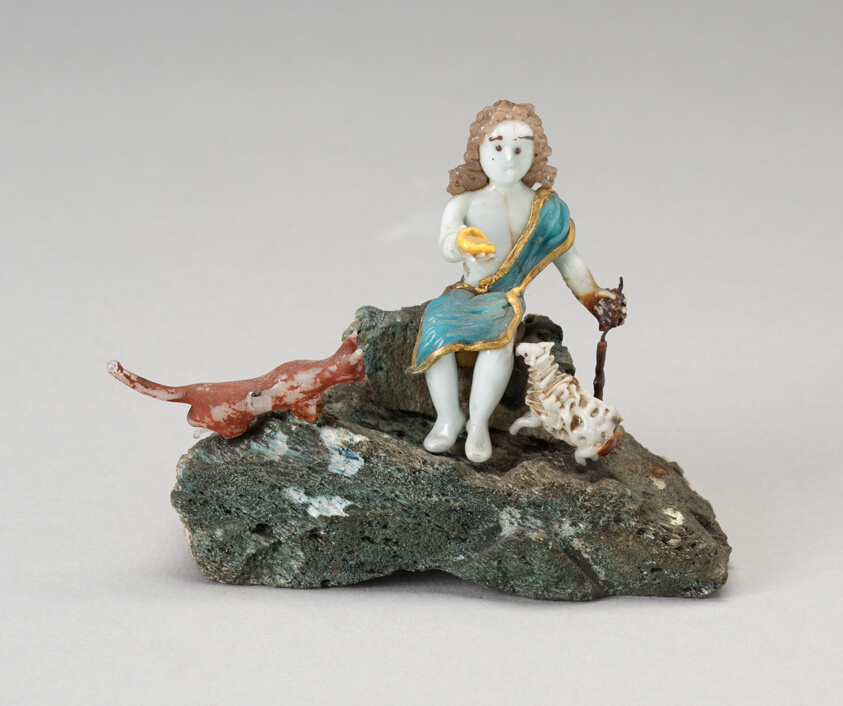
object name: Glass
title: Orpheus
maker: Nevers, France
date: Late 18th to 19th century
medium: Glass; lampwork (verre de Nevers), metal armature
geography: France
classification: glass; miniature; decorative object/ornament; european decorative arts